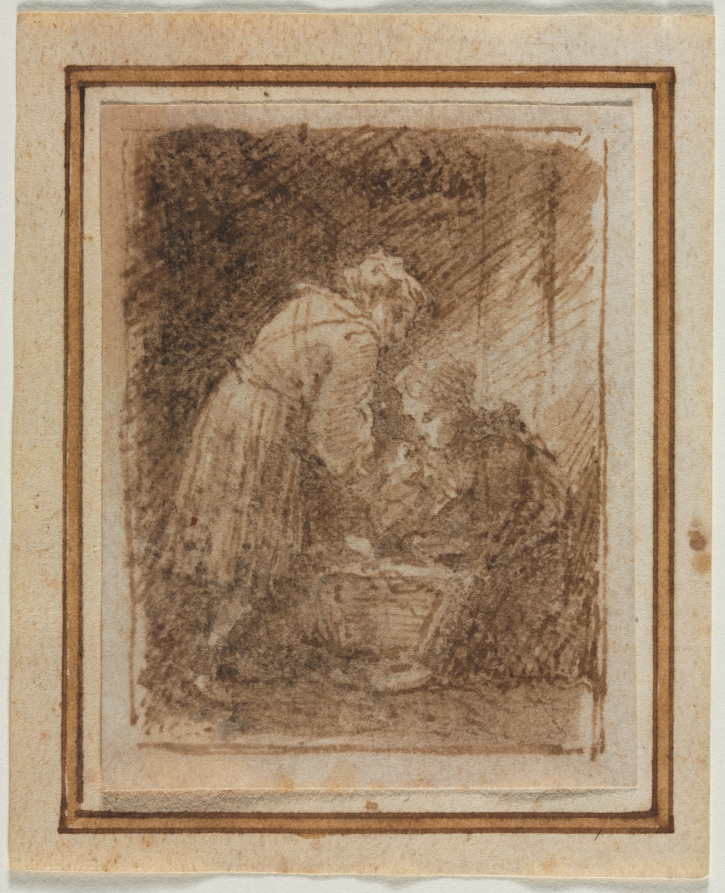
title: Holy Family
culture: Netherlands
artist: Anonymous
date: 1600s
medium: pen and brown ink and brush and brown wash over traces of black chalk or charcoal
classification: Drawing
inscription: VERSO OF SECONDARY SUPPORT (now removed), upper center, in graphite: [27?] [cropped]